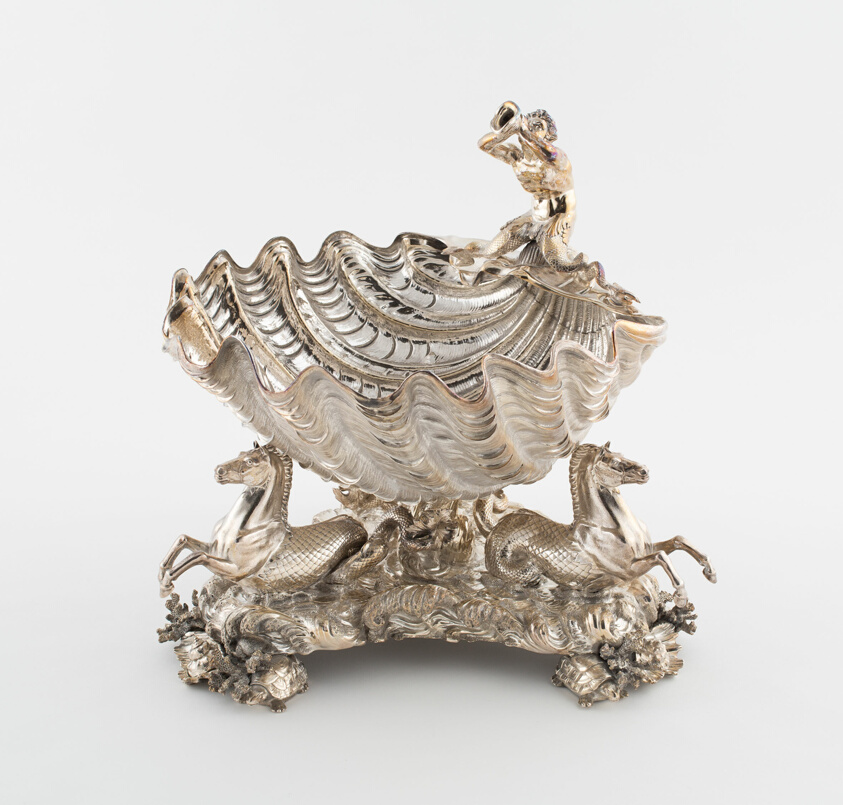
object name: Metalwork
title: Tureen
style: rococo revival, 19th century, baroque revival, regency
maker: John Bridge; English, 1755–1834; Rundell, Bridge and Rundell; English, 1788–1843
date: 1824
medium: Silver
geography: England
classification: metalwork; silver; european decorative arts; bowl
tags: Tureen, dining, mermaids, Neptune, turtle